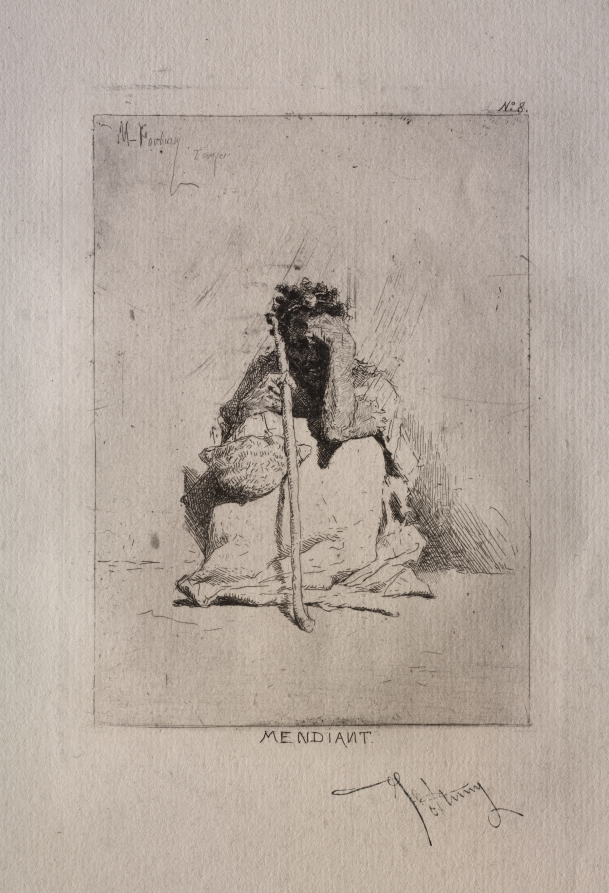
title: Beggar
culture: Spain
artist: Mariano Fortuny (Spanish, 1838–1874)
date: c. 1862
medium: etching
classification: Print